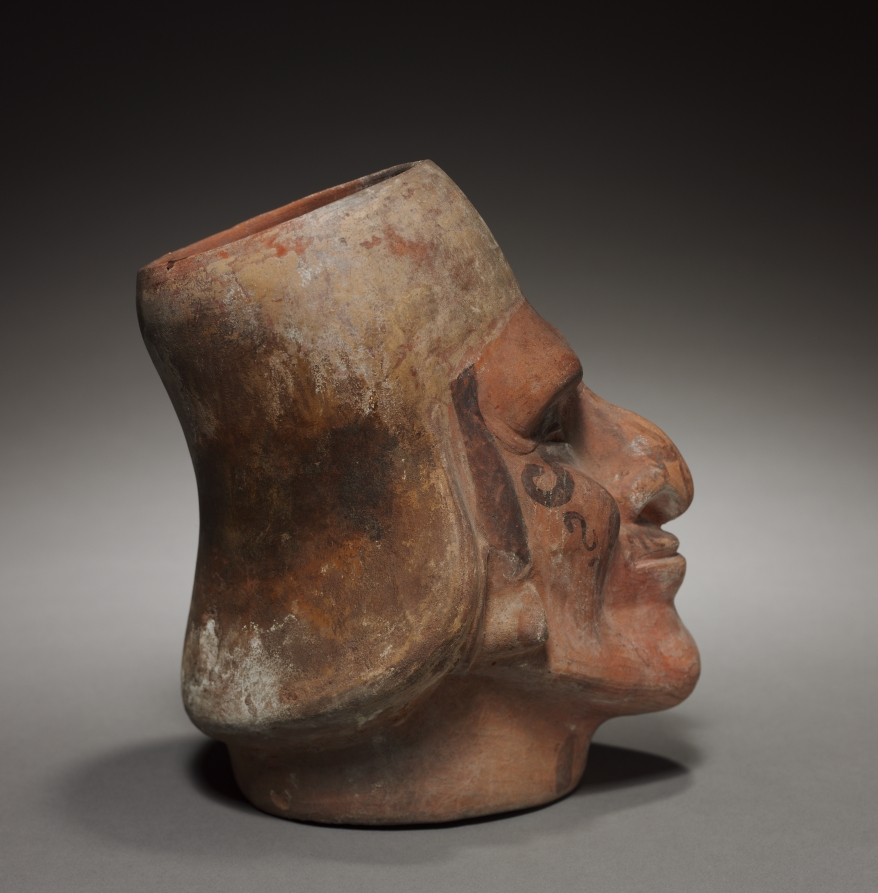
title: Vase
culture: Peru, Mochica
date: before 1930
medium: pottery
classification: Ceramic